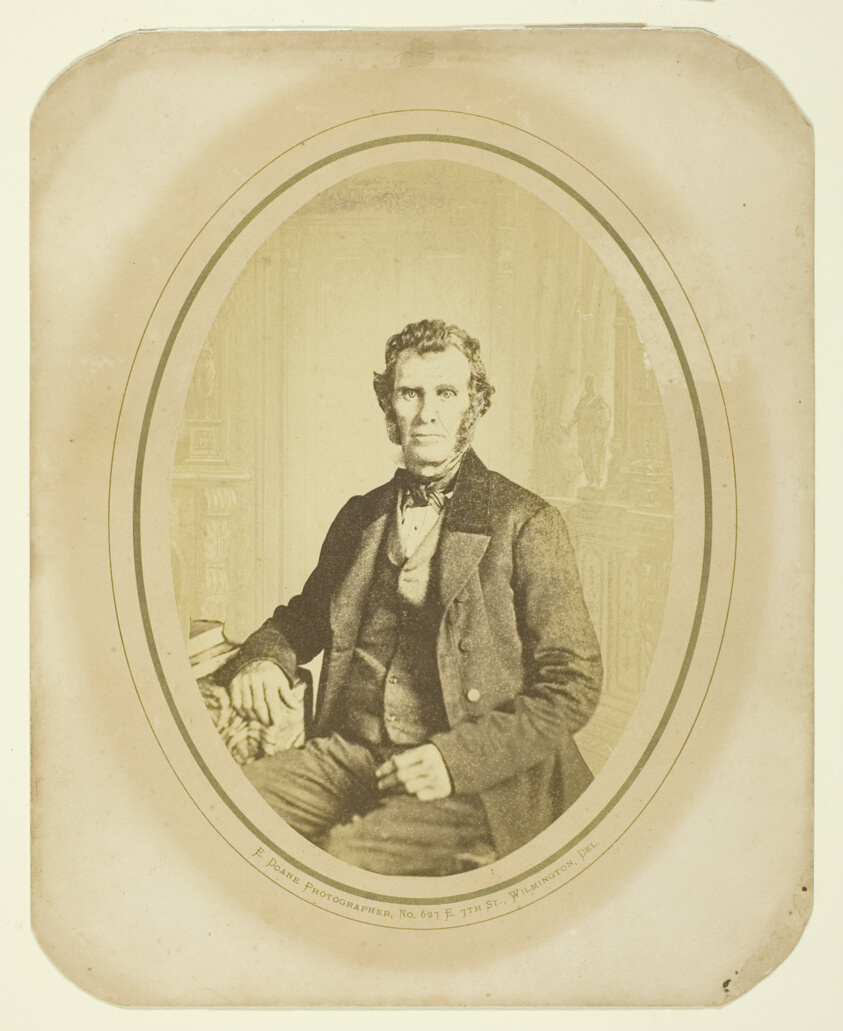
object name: Photograph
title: Untitled (Portrait of a Man)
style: 19th century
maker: E. Doane; American, active 19th century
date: 1850–1900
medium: Albumen print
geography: United States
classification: collodion printing-out-paper print (pop); photographic process; photography; photograph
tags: Collected by Hugh Edwards